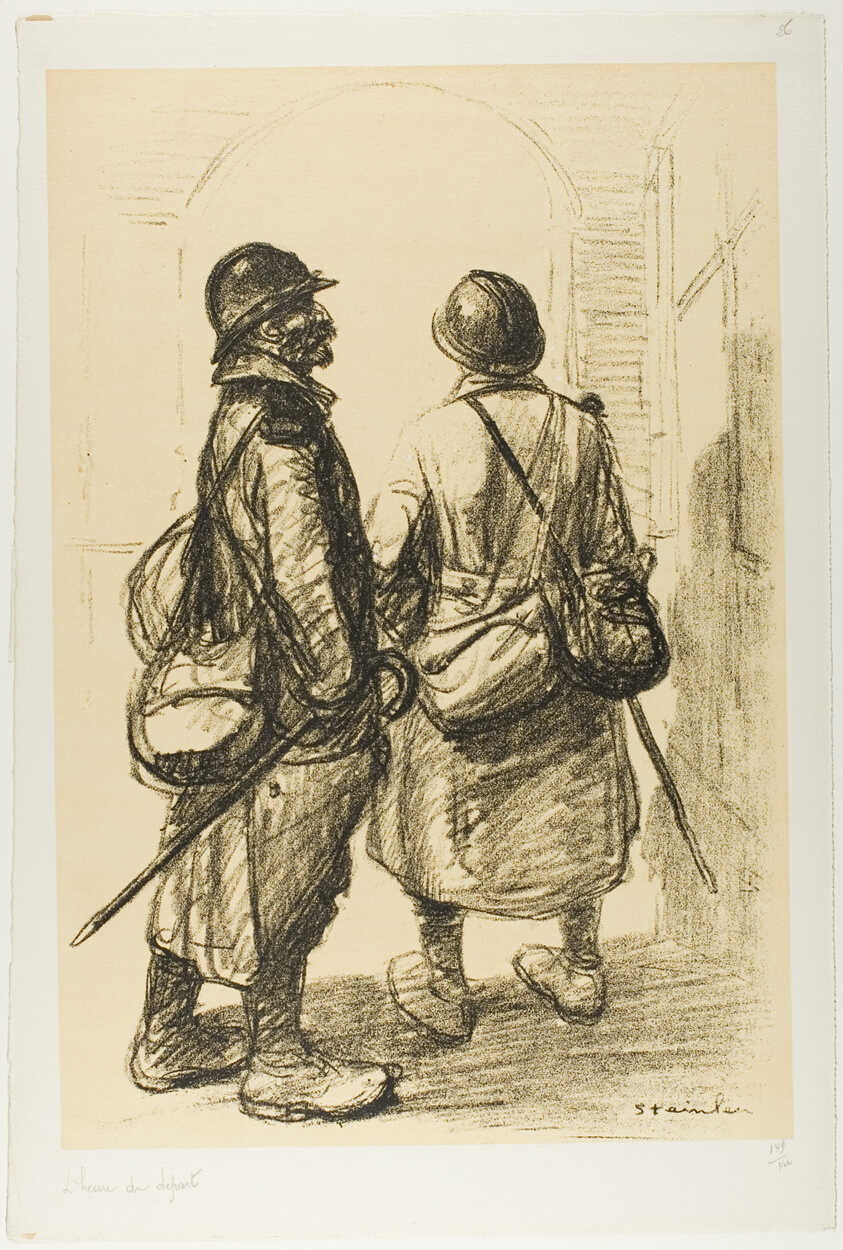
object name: Print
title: The Hour of Departure, plate twenty-six from Actualités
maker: Théophile-Alexandre Steinlen; French, born Switzerland, 1859-1923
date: published March 1916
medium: Lithograph in black over fawn tint on thick off-white wove paper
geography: France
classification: lithograph; print; prints and drawing